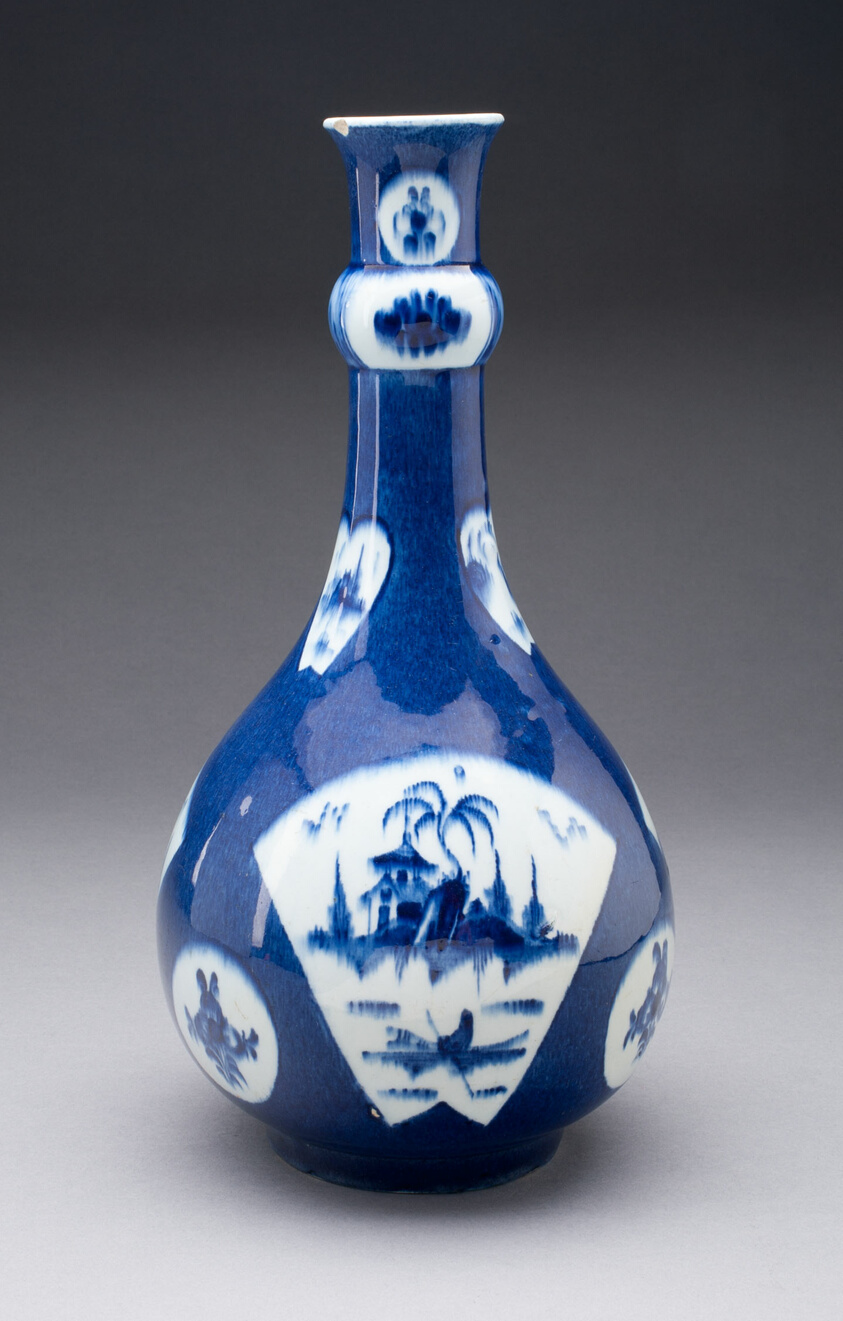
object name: Ceramics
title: Juglet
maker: Bow Porcelain Factory (London, England, 1744–1775)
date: 1755–65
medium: Soft-paste porcelain, underglaze blue decoration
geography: Bow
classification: porcelain; european decorative arts; ceramics